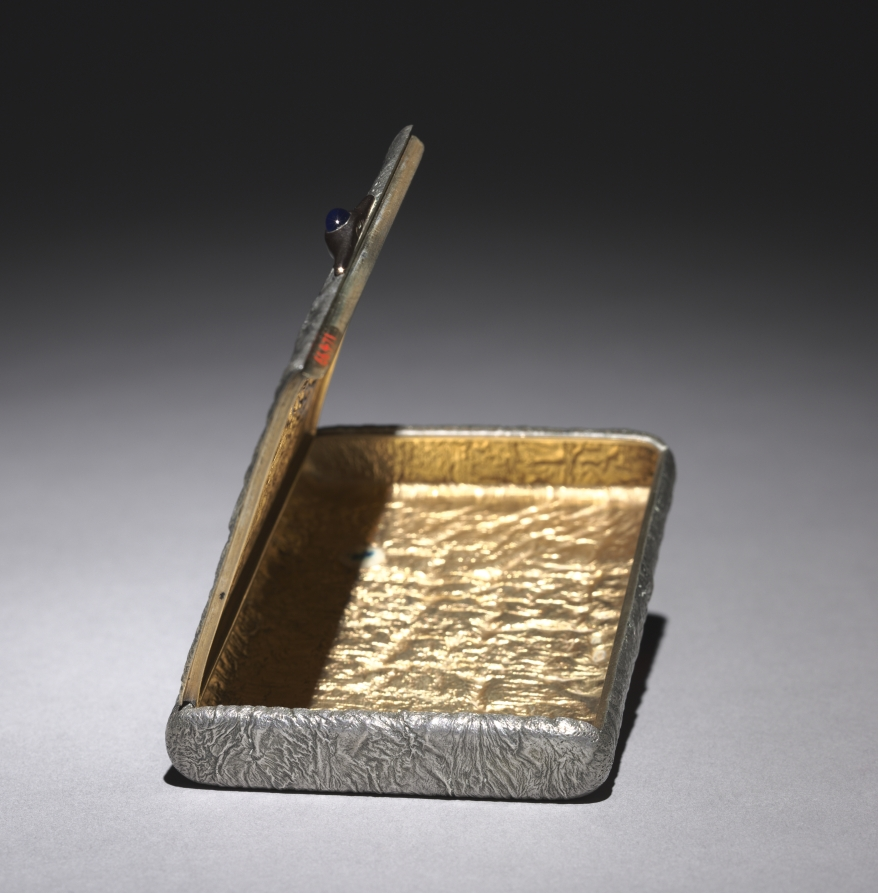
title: Cigarette Case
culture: Russia, St. Petersburg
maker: House of Fabergé (Russian, 1842–1918)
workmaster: Alexander Karpov (Russian)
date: c. 1900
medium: silver, cabochon sapphire mounted in gold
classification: Miscellaneous